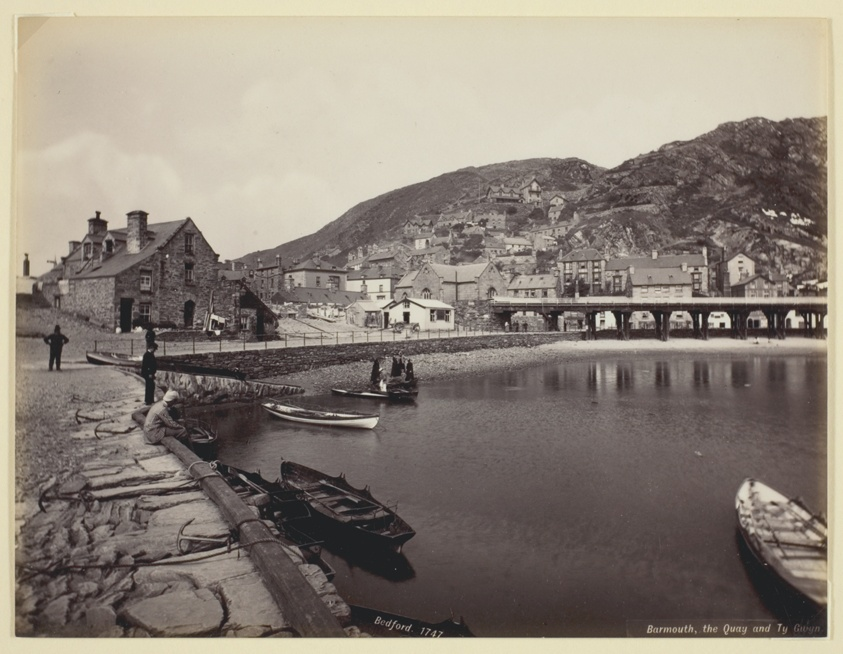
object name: Photograph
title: Barmouth, the Quay and Ty Gwyn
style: 19th century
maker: Francis Bedford (English, 1816–1894)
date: 1860/94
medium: Albumen print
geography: England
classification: albumen silver print; photographic process; photography; photograph